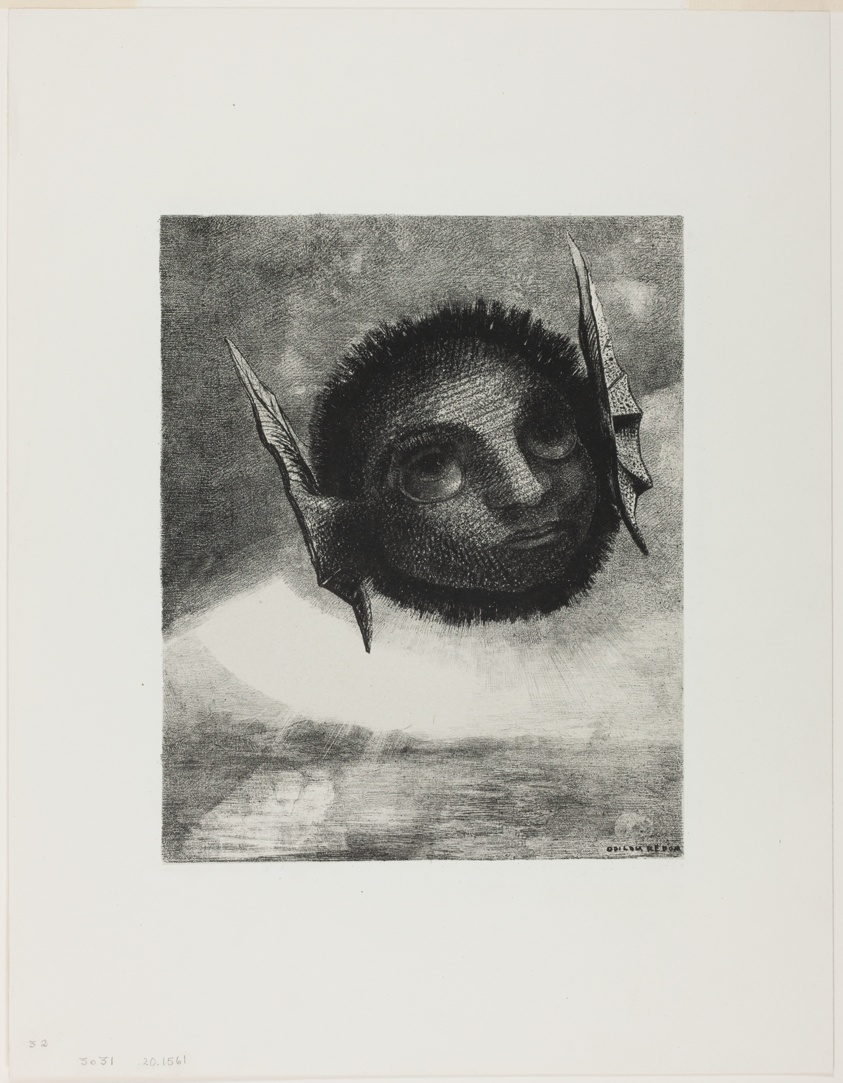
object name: Print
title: Gnome, plate six from In Dreams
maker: Odilon Redon (French, 1840-1916)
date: 1879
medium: Lithograph on mounted ivory China paper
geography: France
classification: lithograph; print; prints and drawing; paper